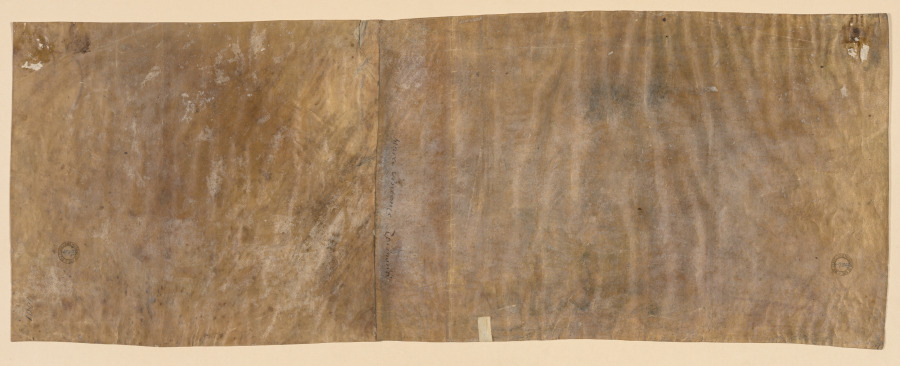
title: Bacchanalian Scene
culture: Italy, late 16th-early 17th Century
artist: Francesco Bertelli (Italian)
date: late 1500s-early 1600s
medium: engraving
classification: Print